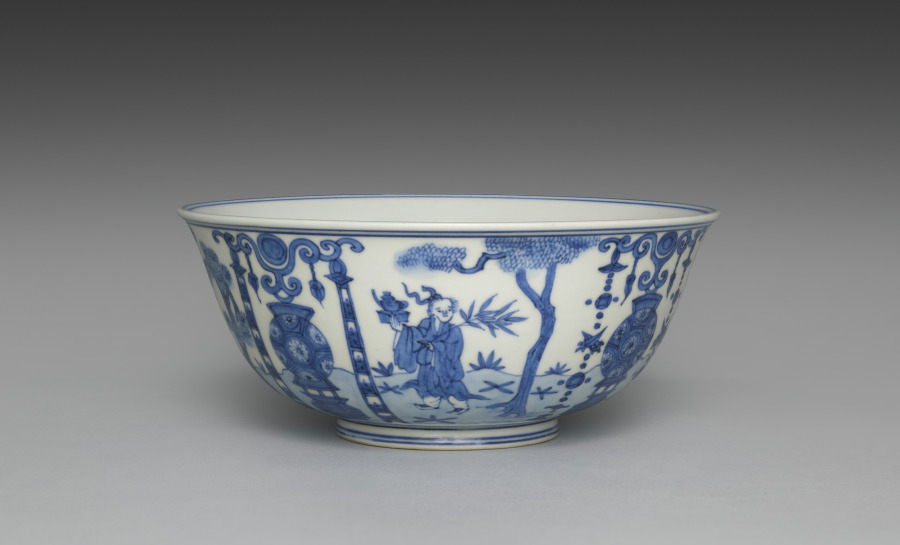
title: Bowl from Nesting Bowls with Daoist Immortals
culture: Japan, Meiji period (1868–1912)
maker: Seifū Yohei III (Japanese, 1851–1914)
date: 1893–1914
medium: Inner bowl from a set of three bowls; porcelain with underglaze blue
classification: Ceramic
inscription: 大日本清風造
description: Yohei III was capable of ink painting–like compositions in underglaze blue, as well as more decorative ones like that on this set of three nesting bowls. Bowls with very similar designs in five colors were produced in the reign of the Wanli emperor (reigned 1572–1620) during the Ming dynasty, and Yohei must have had direct access to one of these or to a close copy. A scene of Daoist immortals is presented on the bowls. On each one, the ground plane is defined with a blue wash. Four lanterns are evenly spaced around the bowl. Two are flanked with linked-piece metalwork banners of the seven treasures. The alternate altars are adorned with textile banners. In between them are four immortals, each standing beneath a tree with small plants surrounding his feet. Two of the immortals hold fruit on a tray. Another carries an elixir-filled ewer and a willow branch. The fourth holds a swastika (manji), here an auspicious symbol, and a flower. Curiously, the inscription inside each footring reads “Made by Seifu of Great Japan,” in emulation of the dynasty and reign inscriptions that appear on Chinese ceramics; however, one can also see through the translucent glaze another inscription, “Seifu Yohei,” written in large characters within a double band of blue on the largest bowl.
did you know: In the bottom of each bowl is a scene of two robed immortals who appear to stand on a precipice in a mountainous landscape high in the clouds, with celestial orbs over their heads.